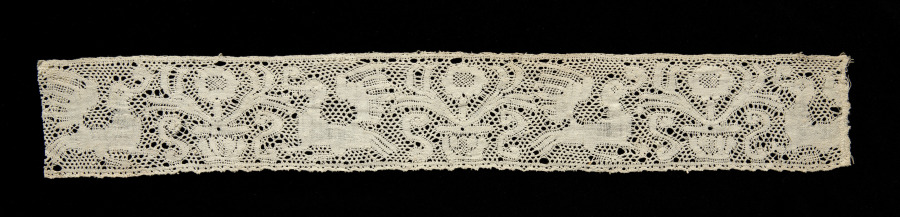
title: Lace Insertion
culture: Italy, Abruzzi, Pescocostanzo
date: 1600s–1700s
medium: Bobbin lace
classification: Lace